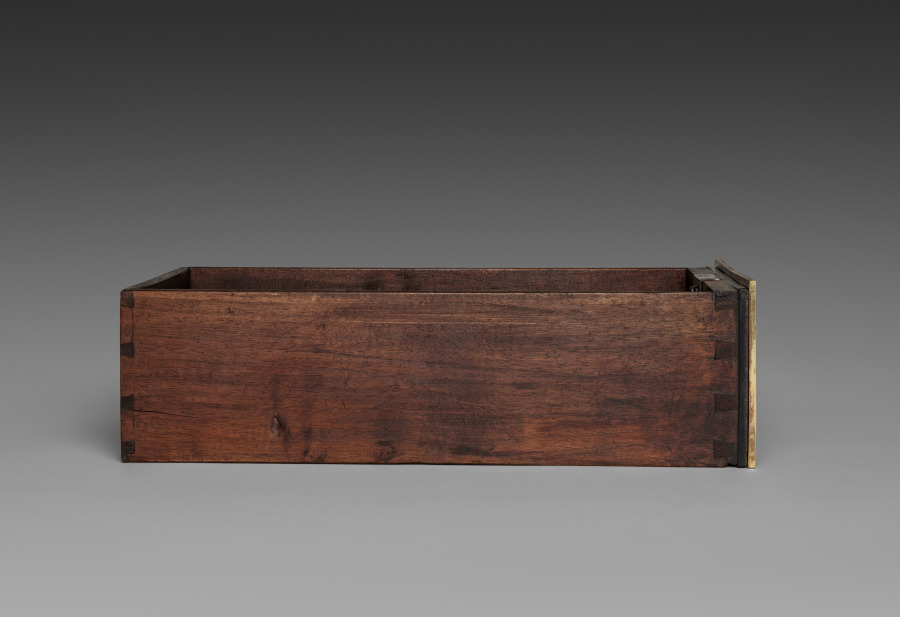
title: Side Drawer for Cabinet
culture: France, late 17th Century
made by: André-Charles Boulle (French, 1642–1732)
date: c. 1690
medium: ebony, marquetry in metal and tortoise shell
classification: Furniture and woodwork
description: Appointed cabinetmaker to King Louis XIV in 1672, André-Charles Boulle became a master of furniture making in France during the late 1600s until his death in 1732. Known primarily for his use of marquetry, in which metal patterns are inlaid into tortoiseshell then applied within the veneered surface of the furniture, Boulle established a level of quality and craftsmanship few others could achieve. As a result, his work found favor at the royal court and among other aristocrats and diplomats eager to impress the king. The inclusion of a medallion depicting Louis XIV within the bronze decoration of this chest would have identified the owner with the royal court. Often exhibiting stout architectural proportions with elegant groups of inlaid motifs such as the parrot on the central panel of this chest, Boulle’s designs are an example of the intellectual fashion for contrasting ideas, materials, and motifs.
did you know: Originally designed to sit atop an elaborate tall stand, this chest was likely altered in the late 1700s to reduce its scale and height.